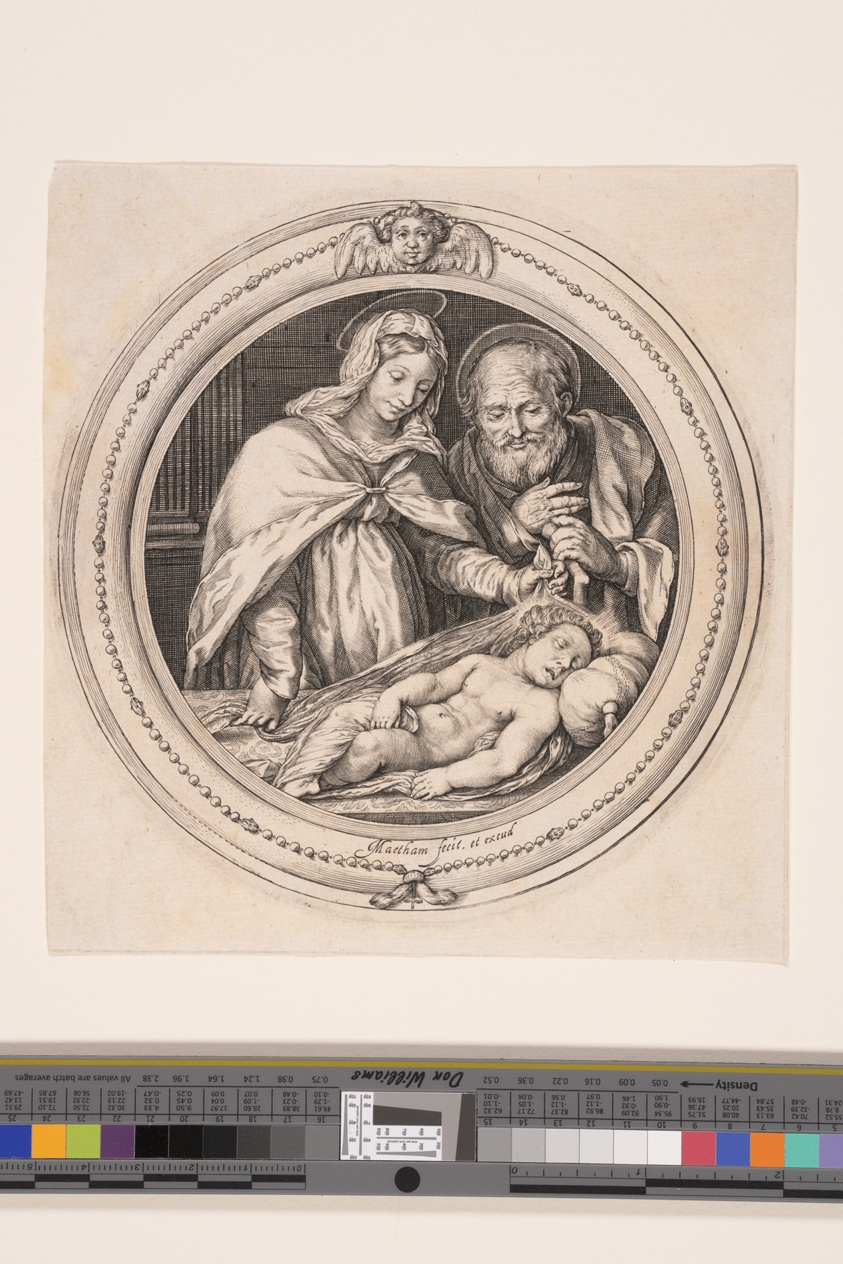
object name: Print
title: The Holy Family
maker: Jacob Matham (Dutch, 1571–1631)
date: c. 1590-1600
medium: Engraving on paper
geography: Netherlands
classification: engraving; paper; print; prints and drawing